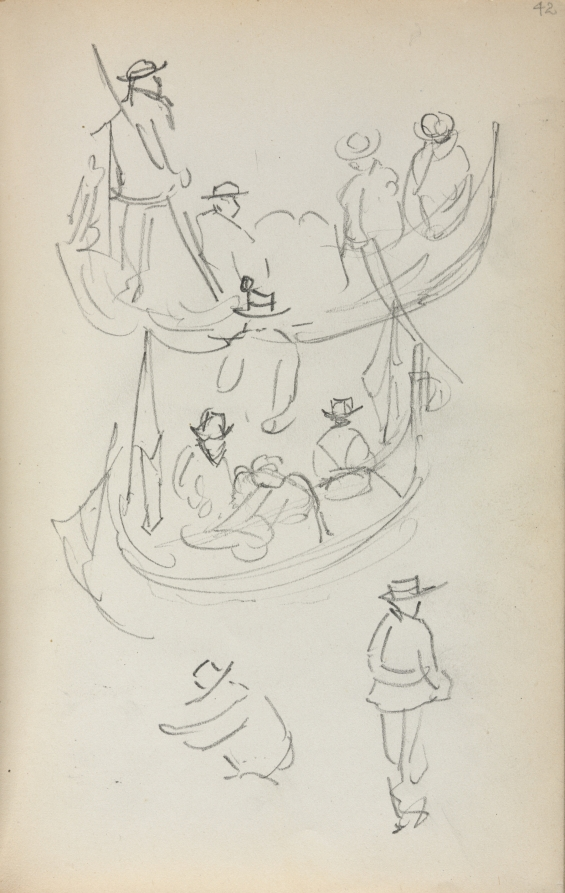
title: Italian Sketchbook: Two Gondolas with figures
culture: America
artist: Maurice Prendergast (American, born Newfoundland [now Canada], 1858–1924)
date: 1898–1899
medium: pencil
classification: Bound Volume